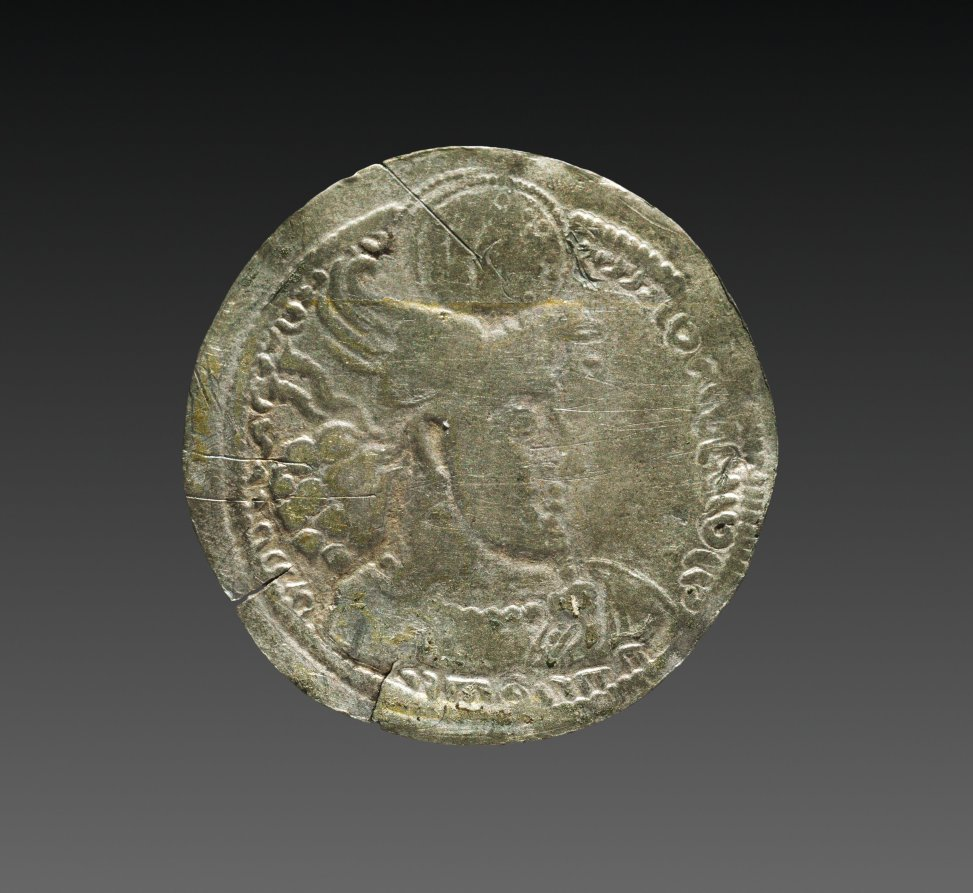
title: Drachma: Bust of Hormizd II, r., wearing crown (obverse)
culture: Iran, (minted), Sasanian Empire (224–651 CE), reign of Hormizd II (303–309)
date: 302–9 CE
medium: silver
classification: Coins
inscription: 𐭬𐭦𐭪𐭠𐭠𐭭𐭬𐭫𐭪𐭠𐭠𐭩𐭫𐭠𐭭𐭬𐭭𐭪𐭲𐭥𐭬𐭭𐭩𐭦𐭣𐭠𐭭 𐭬𐭦𐭣𐭩𐭮𐭭𐭡𐭢𐭡𐭥𐭧𐭬𐭦𐭣